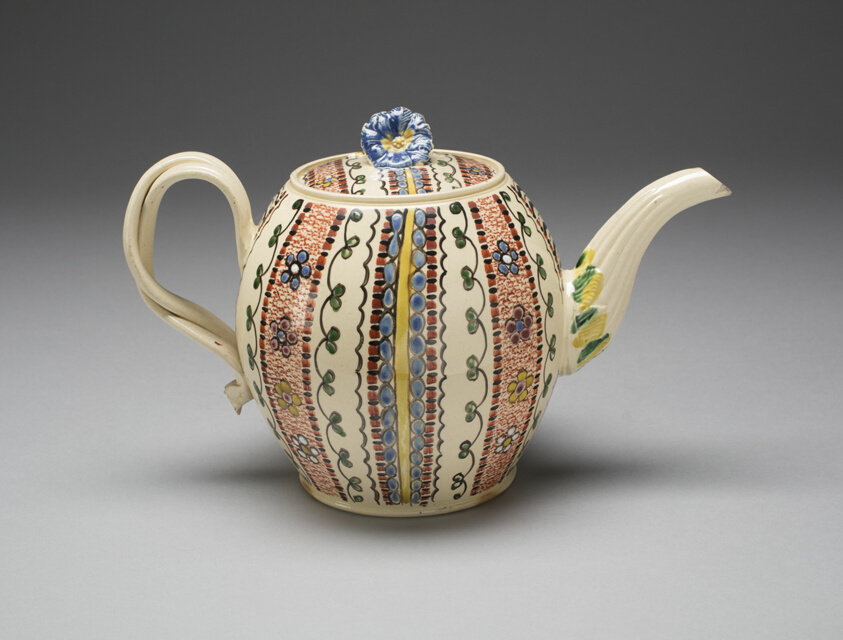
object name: Ceramics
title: Teapot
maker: England, West Yorkshire, Leeds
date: c. 1770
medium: Lead-glazed earthenware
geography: Leeds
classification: teapot; earthenware; european decorative arts; lead-glazed earthenware; ceramics